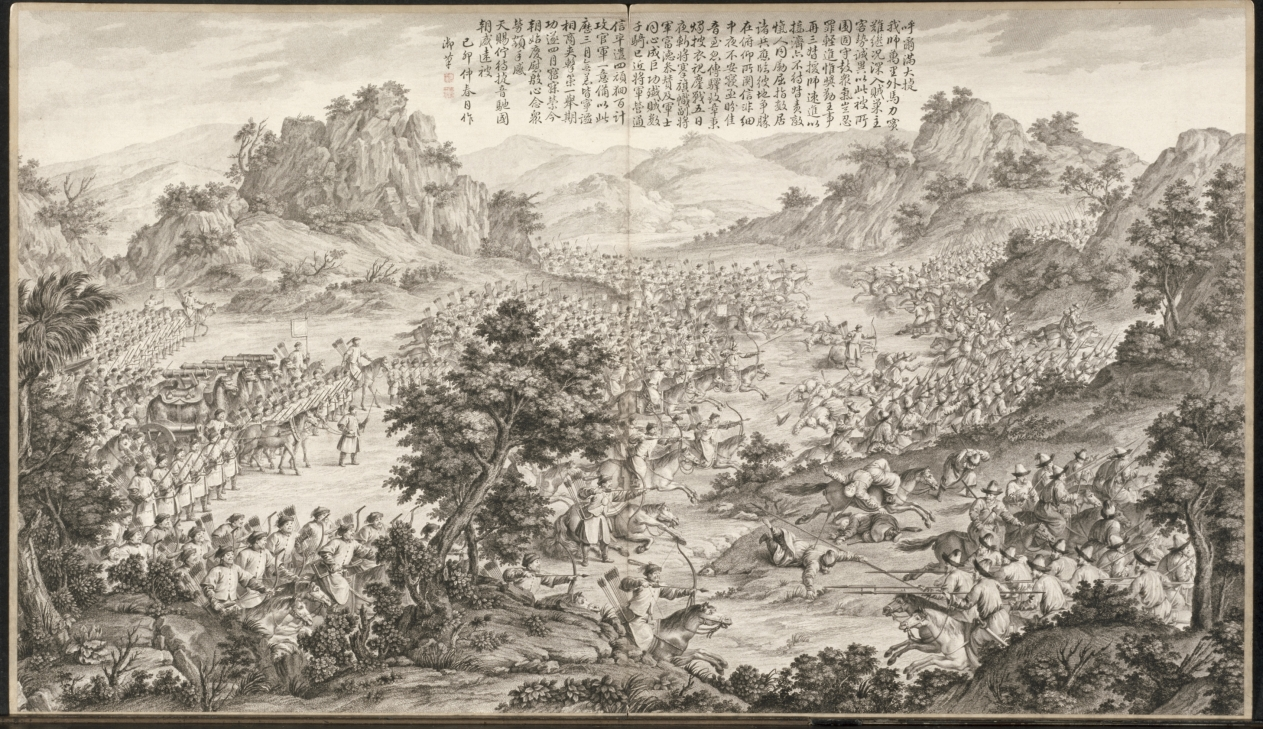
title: Great Victory at Hu'erman: from Battle Scenes of the Quelling of Rebellions in the Western Regions, with Imperial Poems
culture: China, Qing dynasty (1644–1911), Qianlong reign (1736–95)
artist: Jean Damascene Sallusti (Italian, d. 1781)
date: c. 1765–74; poem dated 1759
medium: etching, mounted in album form, 16 leaves plus two additional leaves of inscriptions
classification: Print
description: This set of etchings was commissioned by Emperor Qianlong to record in pictorial terms the courage of his generals and soldiers in quelling the rebellions in the Western Regions. Qianlong added his own poem to each of the etchings, indicating his appreciation and pride in this demonstration of military might. "Western Regions" refers to the present-day Xingjiang province, often described in Western writing as "Central Asia."